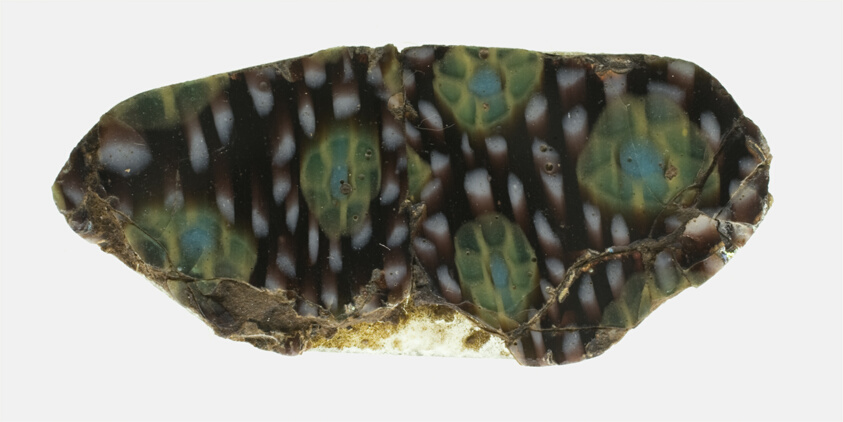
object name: Decorative Arts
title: Fragment of a Revetment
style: roman (ancient, style or period), ancient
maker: Roman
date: 1st century BCE–1st century CE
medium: Glass, mosaic glass technique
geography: Roman Empire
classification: fragment; decorative arts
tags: decoration